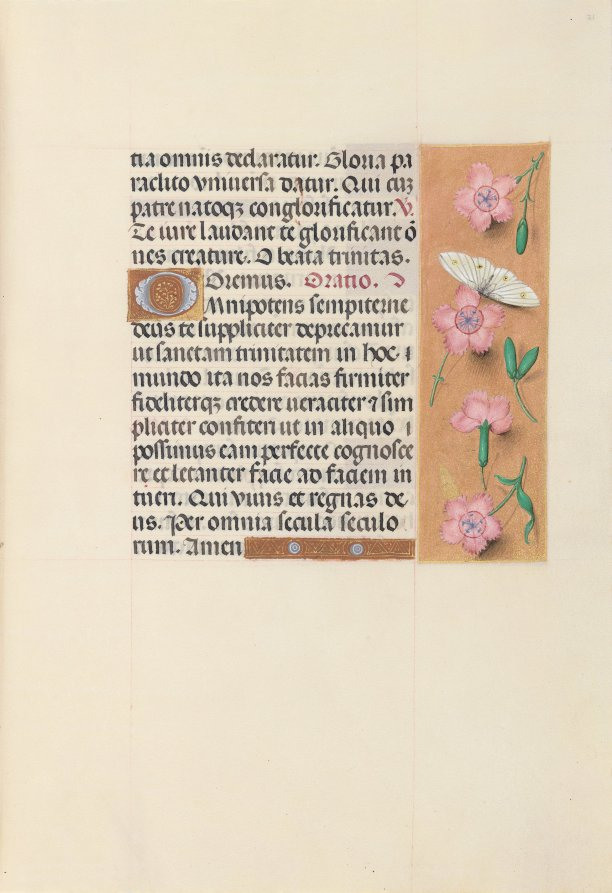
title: Hours of Queen Isabella the Catholic, Queen of Spain: Fol. 21r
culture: Flanders, Ghent and Bruges, late 15th century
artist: Master of the First Prayerbook of Maximillian (Flemish, c. 1444–1519)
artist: and Associates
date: c. 1500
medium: ink, tempera, and gold on vellum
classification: Bound Volume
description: This manuscript was illuminated by a circle of at least five highly organized manuscript painters active in the Flemish cities of Ghent and Bruges. The principal illuminator was Alexander Bening, who painted the majority of the book's miniatures. Manuscripts produced by this circle of artists are renowned for the decoration of their borders, which typically feature a rich variety of realistically-painted flowers, birds, and butterflies. This prayer book, called a book of hours, was intended not for a cleric, but for the private devotions of a lay person-in this case, Isabella the Catholic, Queen of Spain (1451-1504). Isabella's coat of arms embellishes the book's frontispiece. It is unlikely that the book was commissioned by the Queen herself; rather, she probably received it as a diplomatic gift from someone courting her patronage, perhaps Cardinal Francisco Jimenez de Cisneros. A Franciscan friar, Jimenez was dependent upon Isabella for his advancement, first to the post of Queen's confessor in 1492, and then to Archbishop of Toledo in 1495.